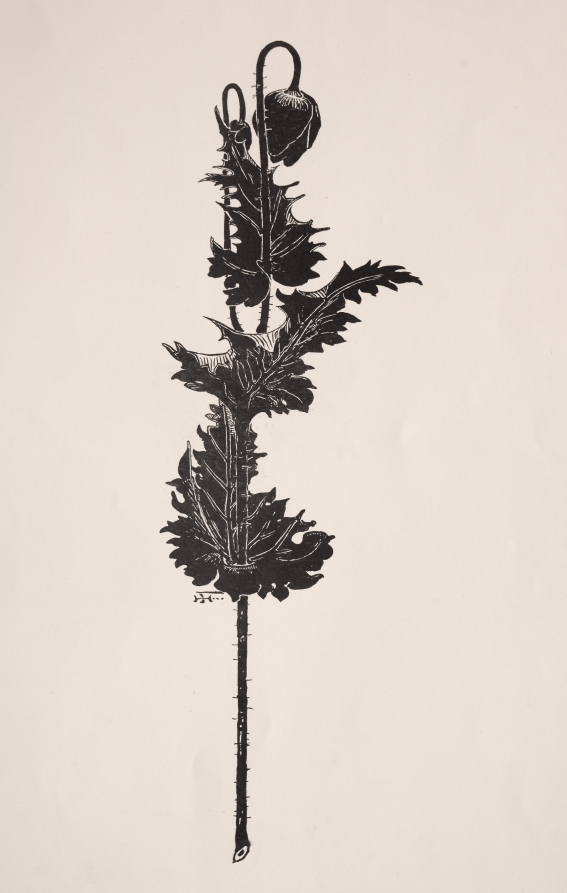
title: Flower Study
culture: America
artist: Harry Fenn (American, 1838/45–1911)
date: 1860–1911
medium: process cut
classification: Print